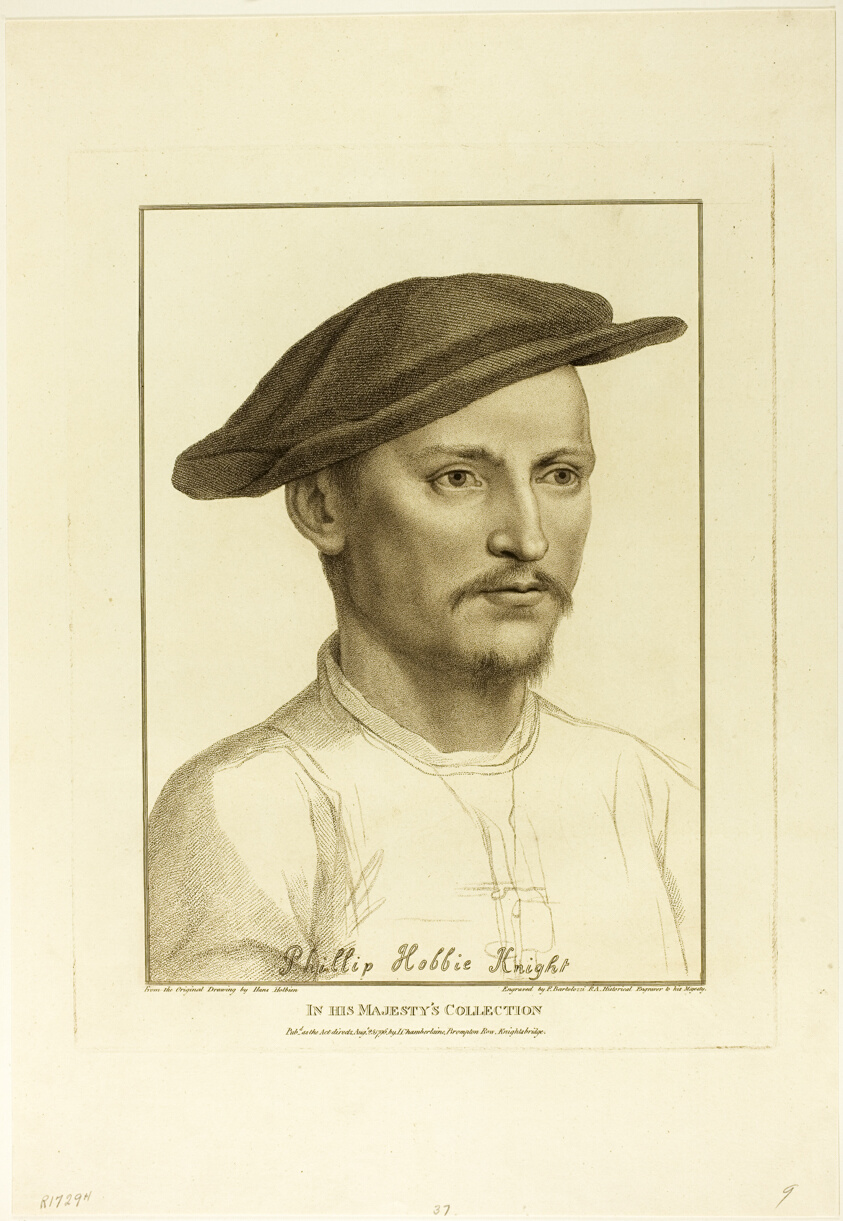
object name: Print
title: Sir Philip Hobby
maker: Francesco Bartolozzi (Italian, 1727-1815); after Hans Holbein the younger (German, 1497-1543)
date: August 25, 1796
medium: Stipple engraving on cream wove paper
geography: Italy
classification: engraving; print; prints and drawing